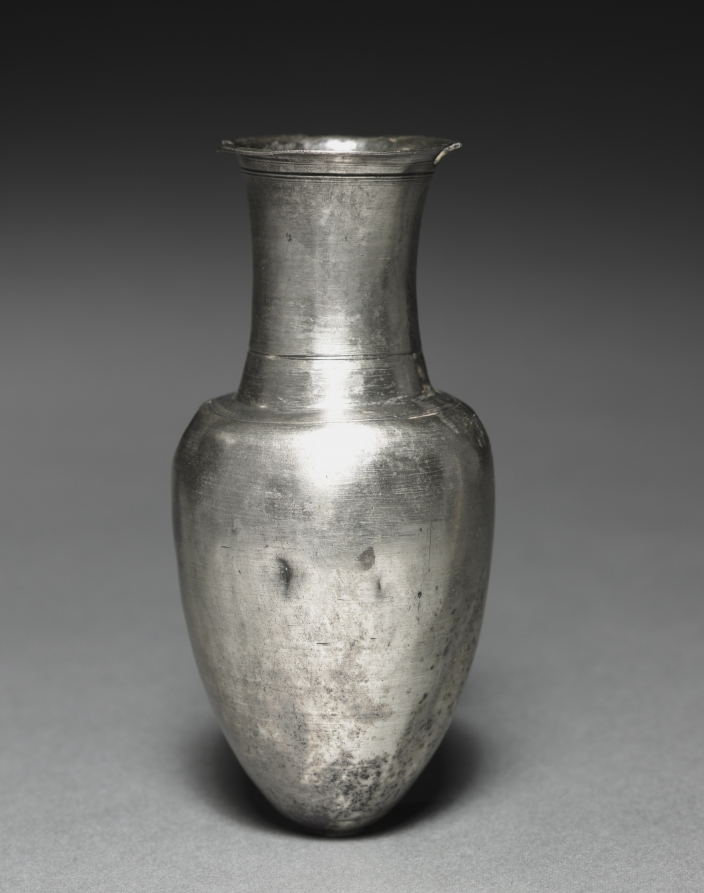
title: Amphoriskos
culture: Greece, late Hellenistic period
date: 200–1 BCE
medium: silver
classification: Metalwork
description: Though now missing both of its original handles, this silver vessel is a miniature version of an amphora, known in Greek as an amphoriskos. Such miniature vessels, made from silver or other materials, were used from the 6th century BCE onwards to store perfumes or scented oils.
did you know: This amphoriskos is made of a single sheet of raised silver.